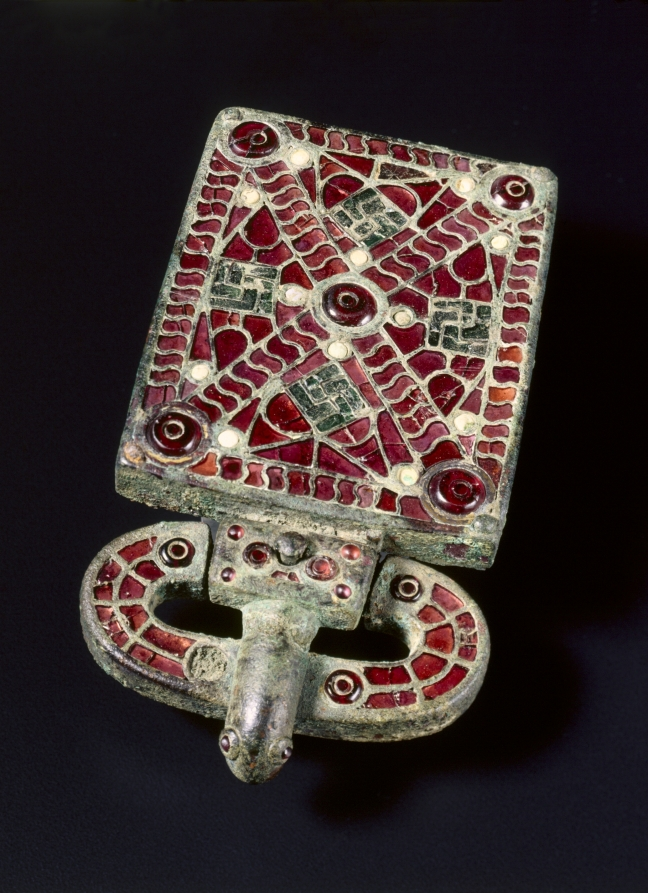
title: Belt Buckle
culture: Visigothic, Spain, Migration Period, 6th century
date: c. 525–560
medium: bronze with garnets, glass, mother of pearl, gold foil, traces of gilding; bronze and glass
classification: Jewelry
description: The art of the European Migration Period (3rd-7th centuries AD) is almost exclusively one of personal adornment-a portable art that followed men and women to their graves. Belt buckles with large rectangular attachment plates have been discovered in cemeteries across the Iberian Peninsula-now occupied by Spain and Portugal-from the period of Visigothic occupation (about AD 412-711). Their decoration varies. Finer examples, like this one, are distinguished by brilliantly inlaid semi-precious stones and colored glass. Garnets were especially prized in Visigothic society for use in cloisonné jewelry. The technique involved the fitting of carefully cut pieces of polished garnet into an intricate grid of compartments, or cloisons. This buckle is so densely inlaid with garnets that it presents a virtual "carpet" of red to the eye. These large Visigothic buckles are strikingly uniform in shape yet endlessly varied in surface design, perhaps a sign that they expressed the personal identities of their original owners. Grave excavations have shown that belt buckles of this type were made for women.